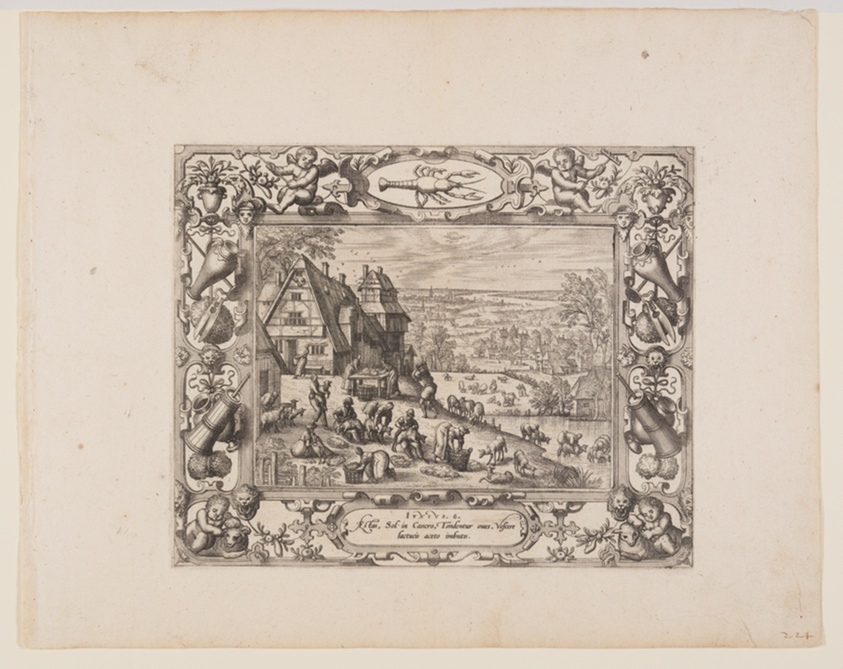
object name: Print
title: June, from The Twelve Months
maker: Pieter van der Borcht (Flemish, 1545–1608) [image]; Johannes van Doetecum (Netherlandish, 1528/32–1605) and Lucas van Doetecum (Dutch, died before 1584) [border]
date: c. 1574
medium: Etching from two plates on ivory laid paper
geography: Flanders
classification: etching; paper; print; prints and drawing